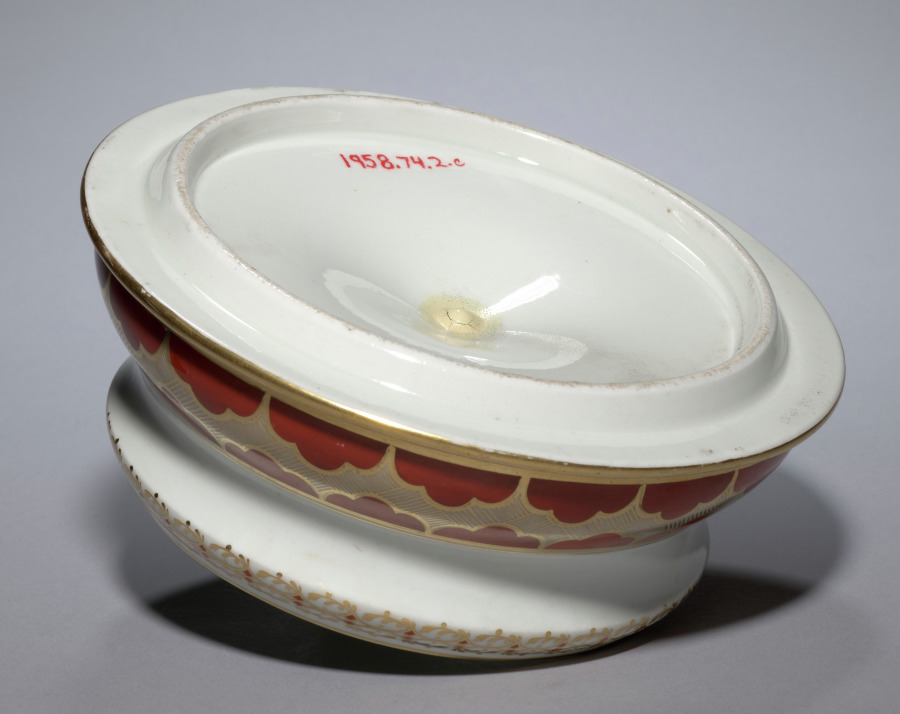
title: Cover for an Ice Pail (2 of 2)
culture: England, late 18th-early 19th Century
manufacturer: Flight & Barr (British)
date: c. 1792–1804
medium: porcelain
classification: Ceramic